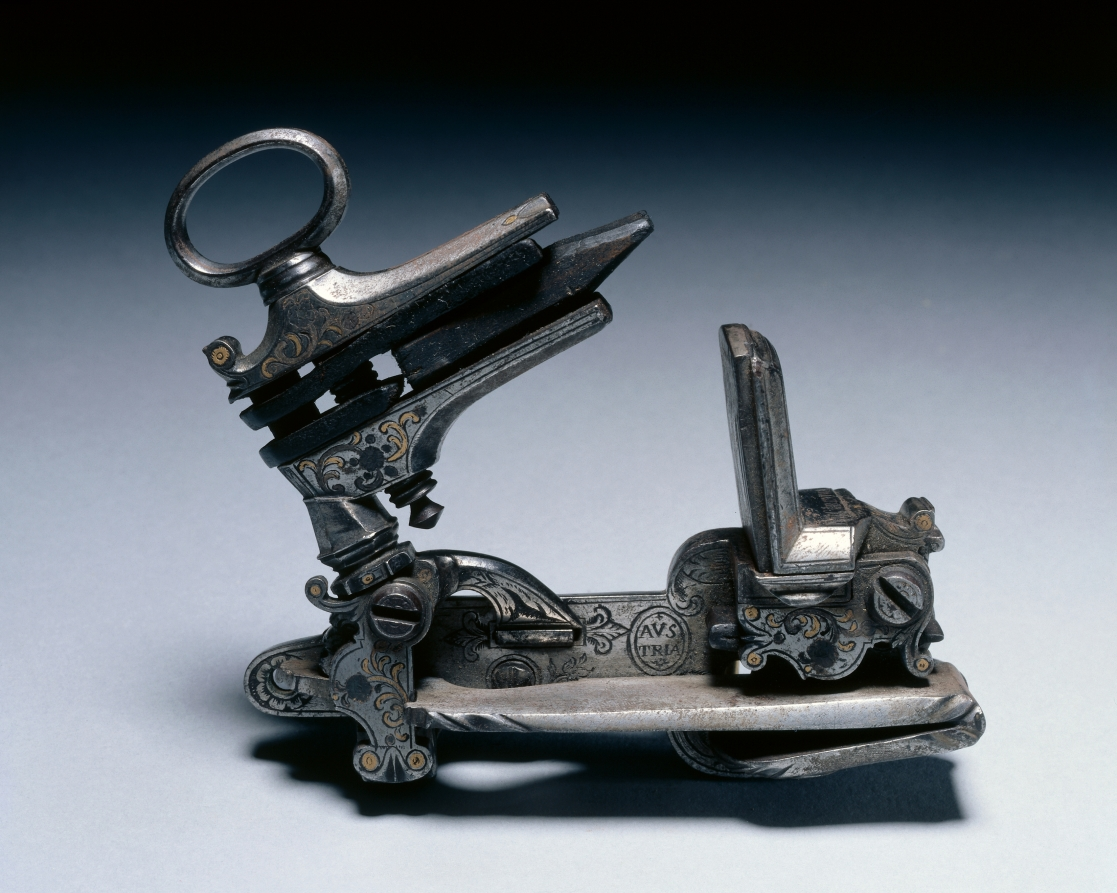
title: Miquelet Lock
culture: Spain, late 17th Century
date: late 1600s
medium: steel, inlaid with gold and silver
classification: Arms and Armor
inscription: on plate: AVS/TRIA; on frizzen: En Cordova